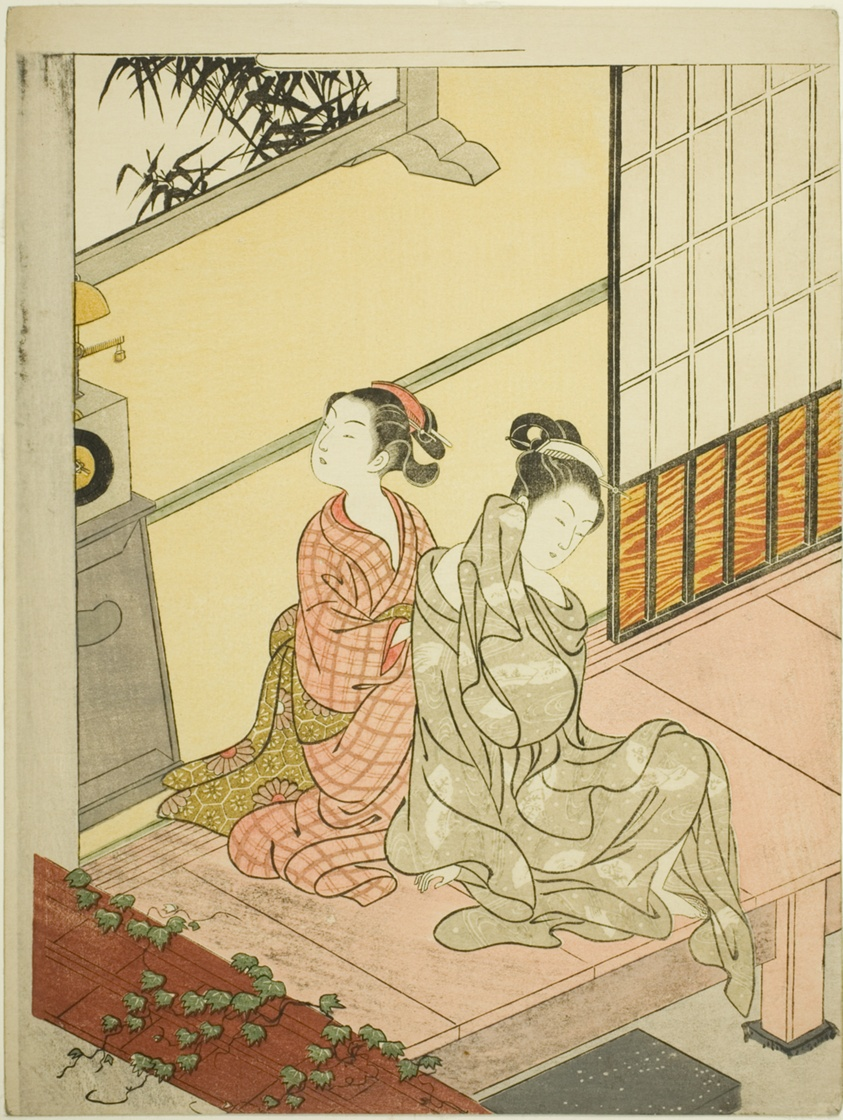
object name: Print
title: The Evening Bell of the Clock (Tokei no bansho), from the series "Eight Views of the Parlor (Zashiki hakkei)"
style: Japanese (culture or style)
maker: Suzuki Harunobu 鈴木 春信; Japanese, 1725 (?)-1770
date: c. 1766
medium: Color woodblock print; chuban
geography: Japan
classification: woodblock print; print; asian art